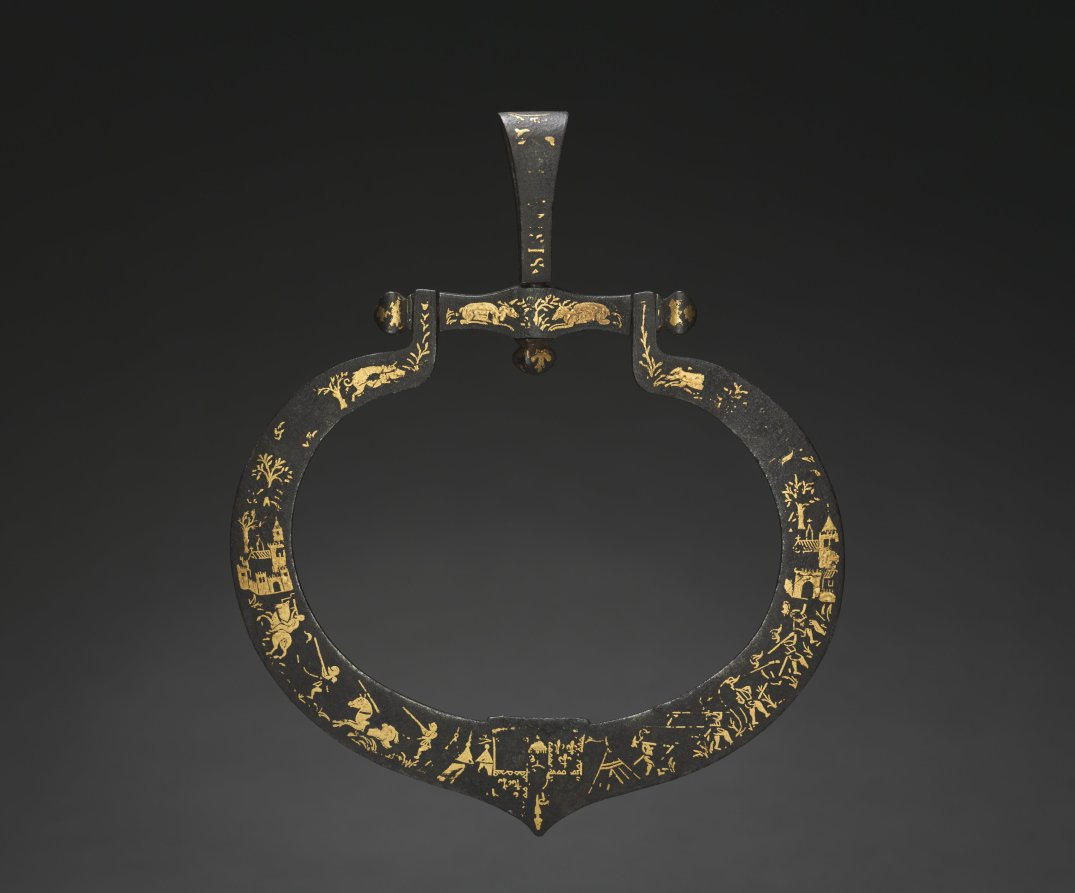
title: Mount for Purse or Escarcelle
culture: Spain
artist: workshop of Diego de Çaias (Spanish, 1535–1560)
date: c. 1559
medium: steel with gold inlay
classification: Metalwork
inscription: swivel suspension loop is inscribed: ALFONSUS ESTENSIS.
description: This object served as a frame for a mounted leather or cloth purse. Worn by men at the waist, such purses were attached by means of a suspension swivel. The handsome gold inlay depicting hunting and military scenes includes the inscription ALFONSVS ESTENSIS, as well as a coat-of-arms that identifies the owner as Alfonso II d'Este, created Duke of Ferrara in 1559.